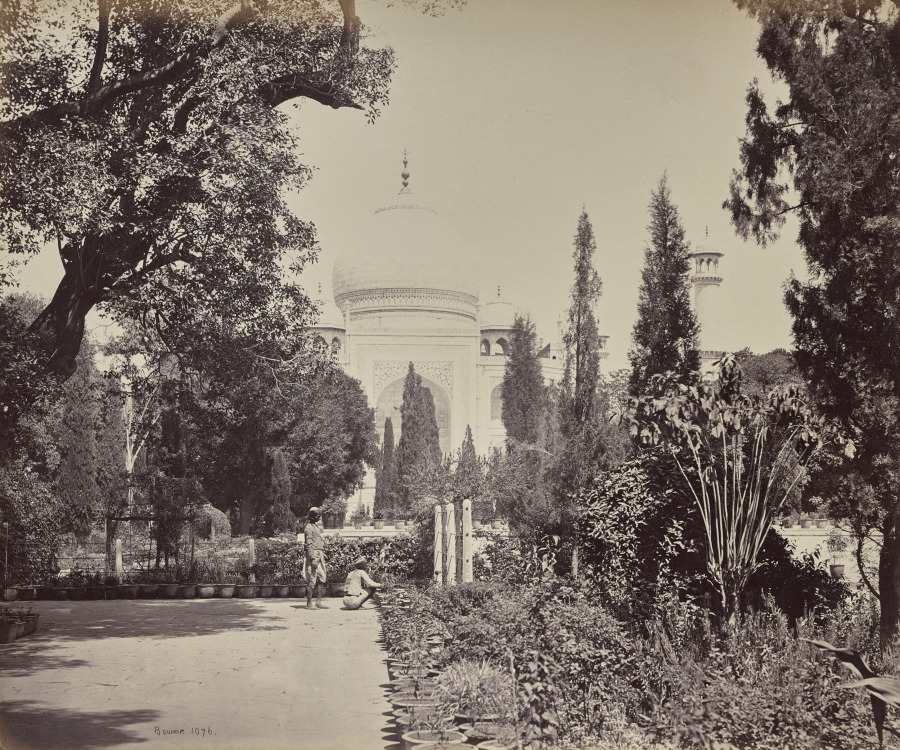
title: Agra. View of the Taj from the Garden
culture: England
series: Photographs of Northern India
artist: Samuel Bourne (British, 1834–1912)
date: 1863–70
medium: albumen print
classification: Photograph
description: The 50 images in this album, all taken in the 1860s, move from the hill towns of the Himalayas down to cities including Lahore (now in Pakistan), Delhi, Lucknow, Agra, Benares (now Varansi), and Calcutta (now Kolkata). Architectural studies of major monuments offer valuable historical records of what sites such as the Taj Mahal and the imperial mosque of the Mughal emperors in Delhi looked like before 20th-century restorations.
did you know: Samuel Bourne, the author of most the images in this album, was a banker in England before he moved to India to become a professional photographer.